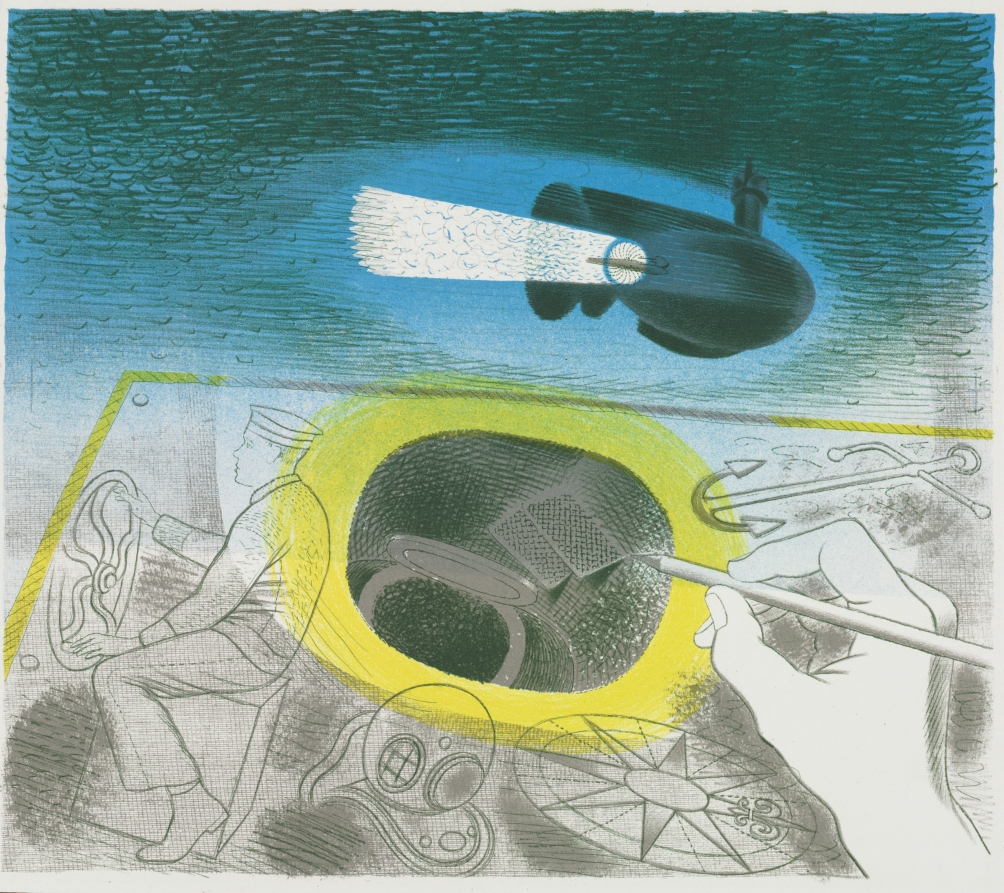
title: Submarine Series: Introductory Lithograph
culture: England, 20th century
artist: Eric Ravilious (British, 1903–1942)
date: 1941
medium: color lithograph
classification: Print